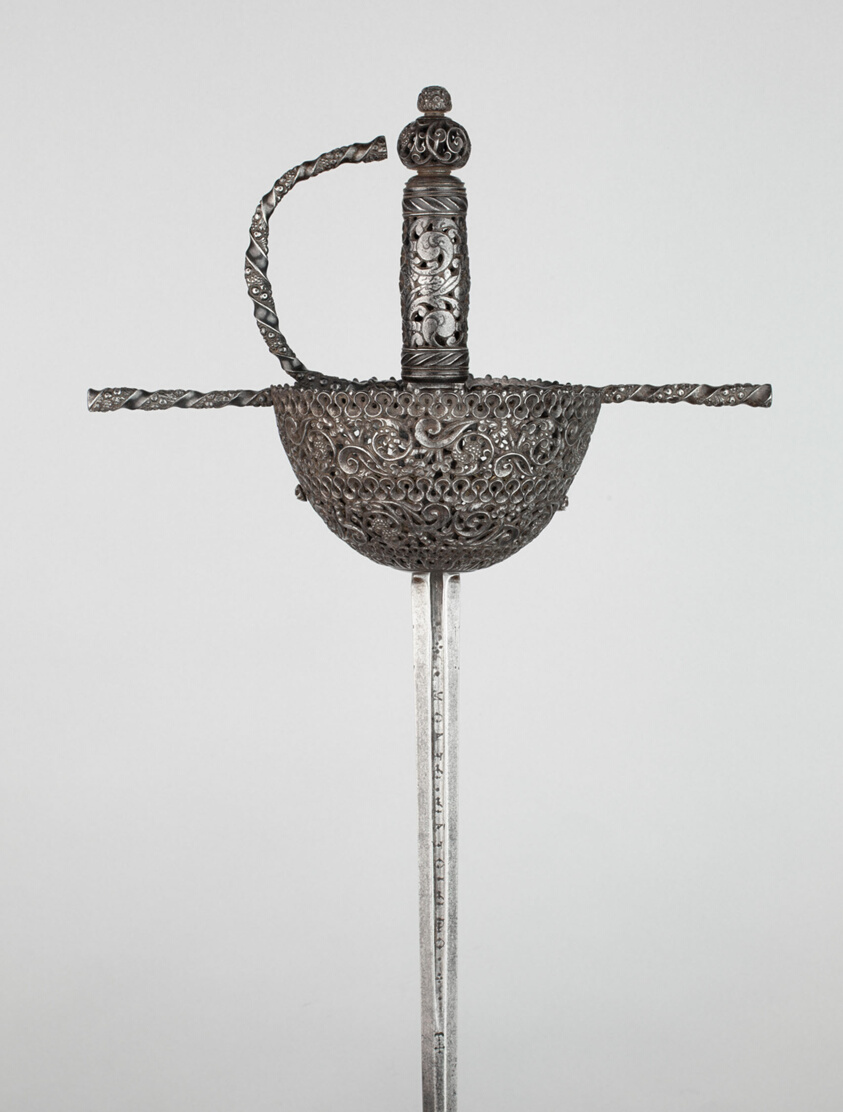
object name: Arms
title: Cup-Hilted Rapier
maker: Spanish or south Italian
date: 1670/90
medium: Steel, iron, brass, and gilding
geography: Italy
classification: edged weapon-sword; arms; arms and armor